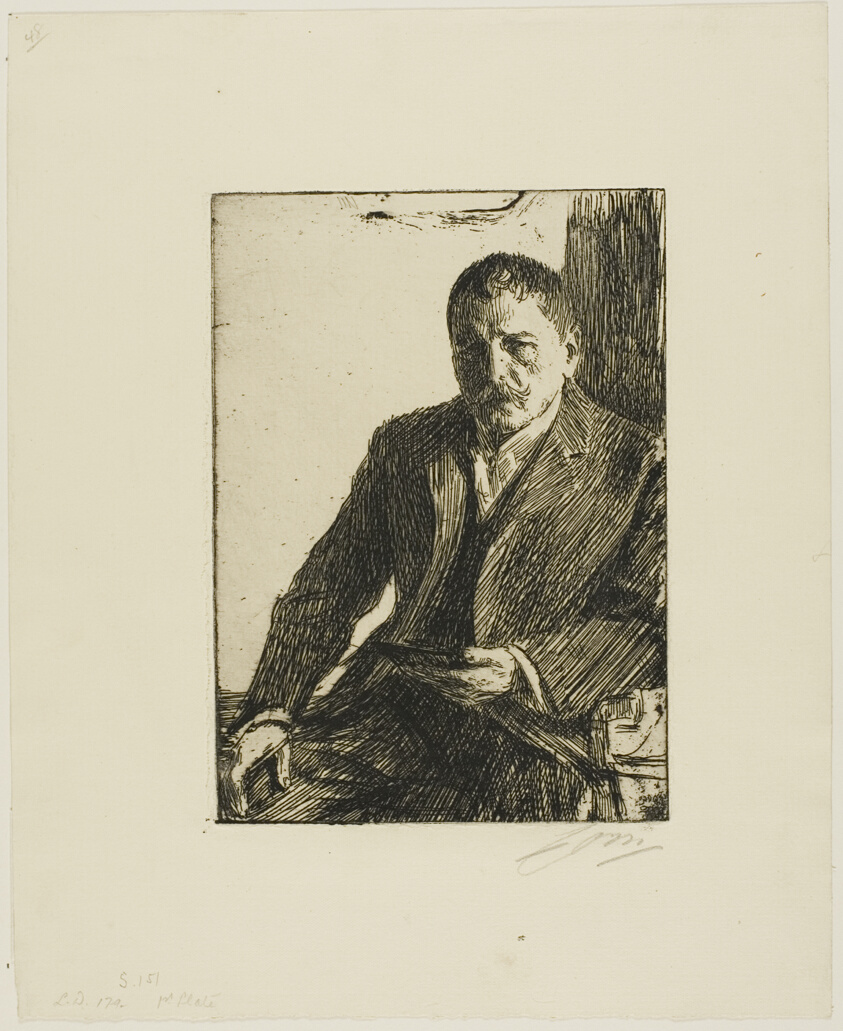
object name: Print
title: Self-Portrait 1904 II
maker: Anders Zorn (Swedish, 1860-1920)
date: 1904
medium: Etching on ivory laid paper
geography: Sweden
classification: etching; print; prints and drawing